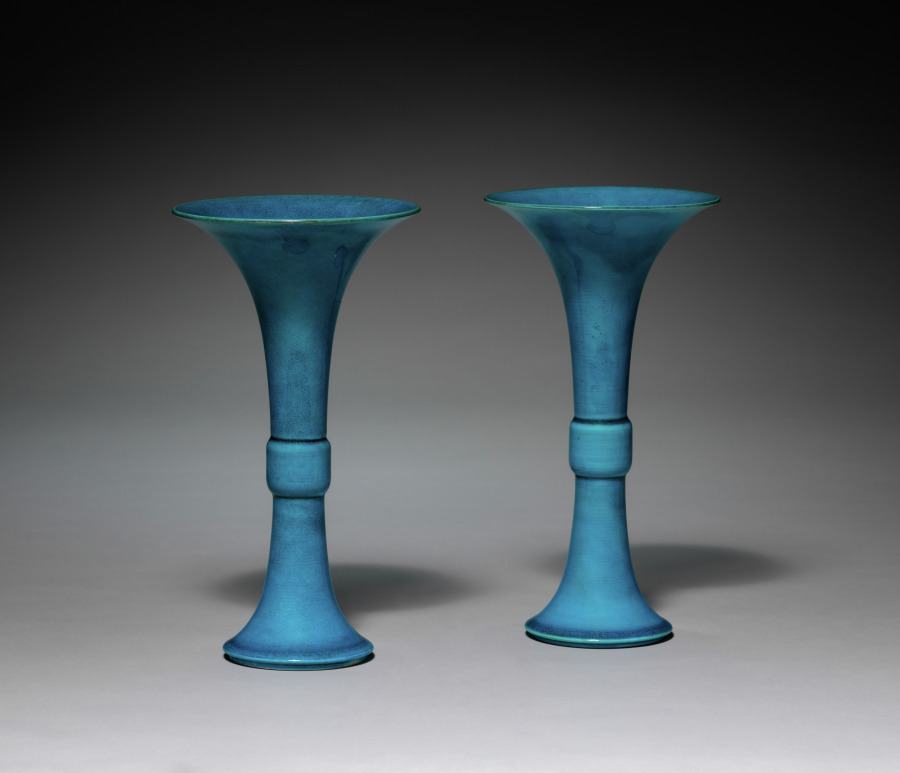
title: Pair of Beaker Vases in Form of Archaic Gu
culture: China, Jiangxi province, Jingdezhen kilns, Qing dynasty (1644–1911), Kangxi mark and reign (1662–1722)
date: 1662–1722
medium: porcelain with peacock-blue glaze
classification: Ceramic